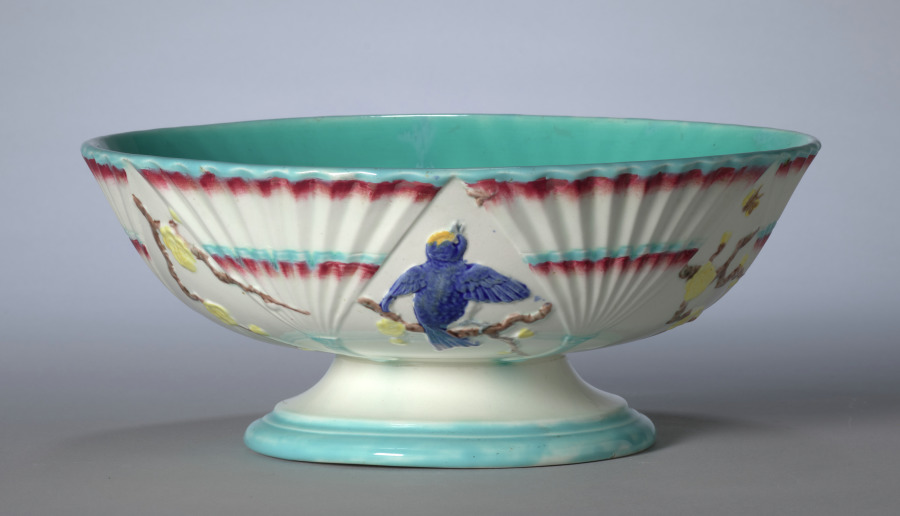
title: Bowl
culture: England, Staffordshire, 19th century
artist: Wedgwood Factory (British)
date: c. 1880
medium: earthenware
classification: Ceramic